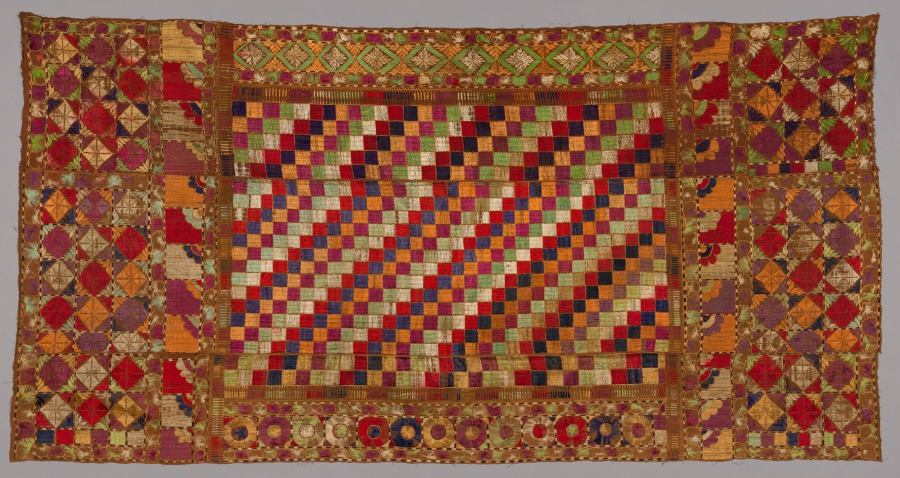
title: Shawl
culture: India, Punjab, 19th century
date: 1800s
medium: embroidery (phulkari); silk on cotton ground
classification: Embroidery